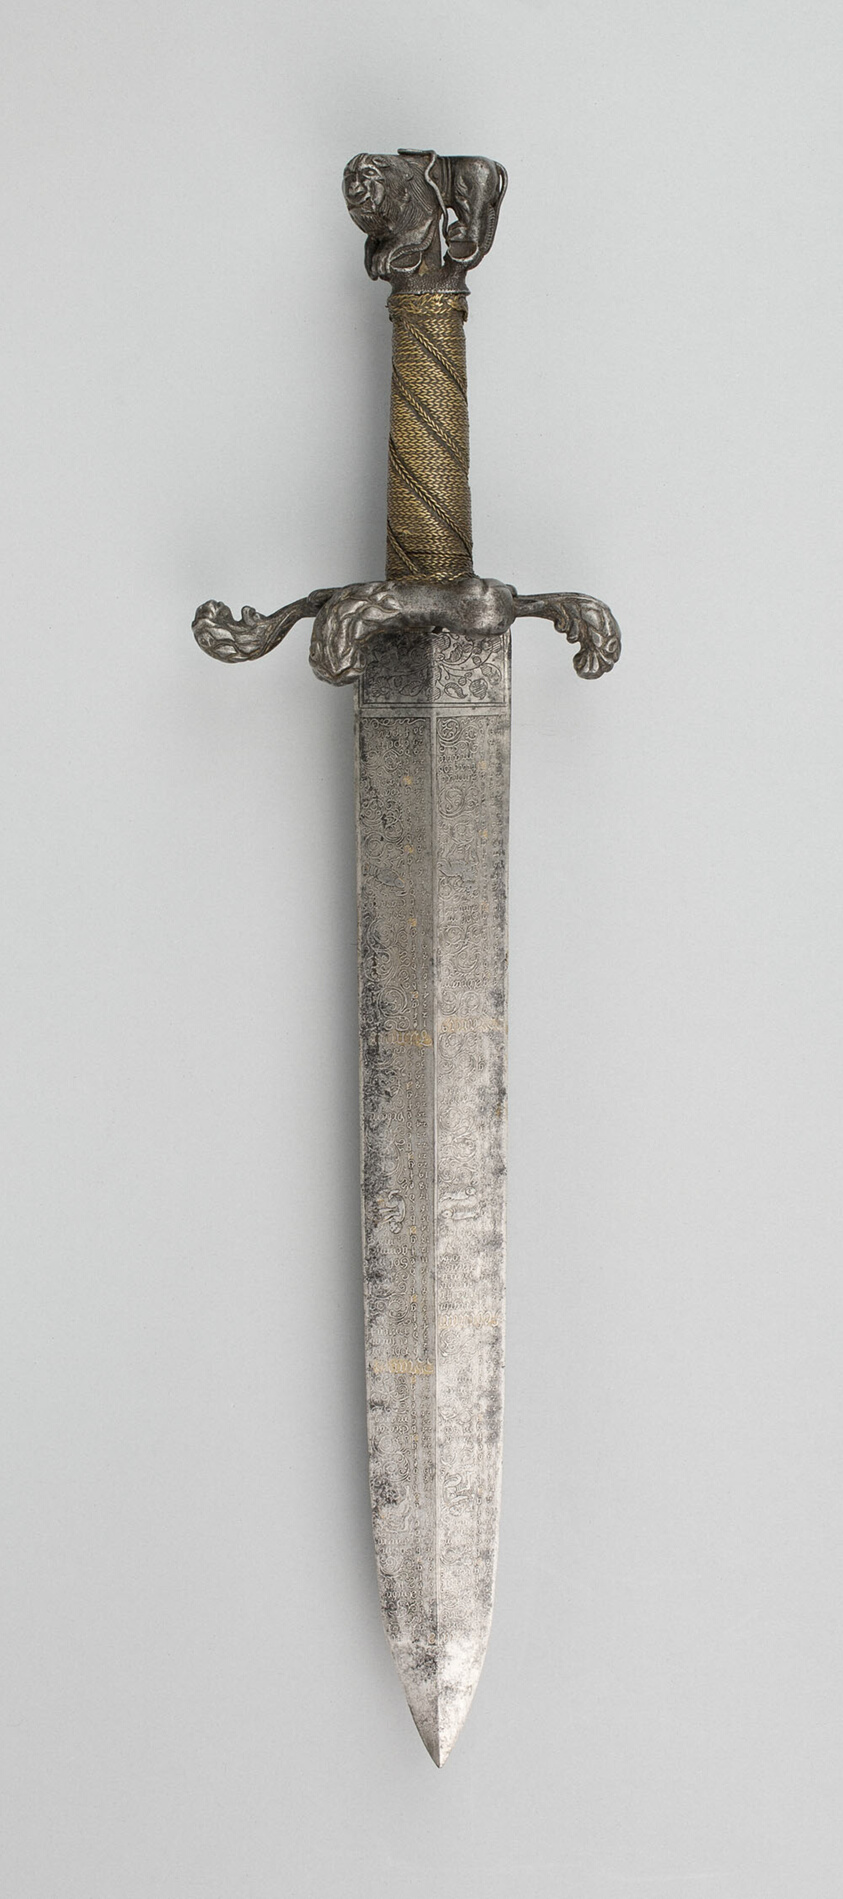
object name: Arms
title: Hunting Hangar with Calendar Blade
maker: German, Munich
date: blade dated 1534, hilt late 17th century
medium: Steel with gilding, wood, and brass wire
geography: Munich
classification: edged weapon-dagger; arms; arms and armor